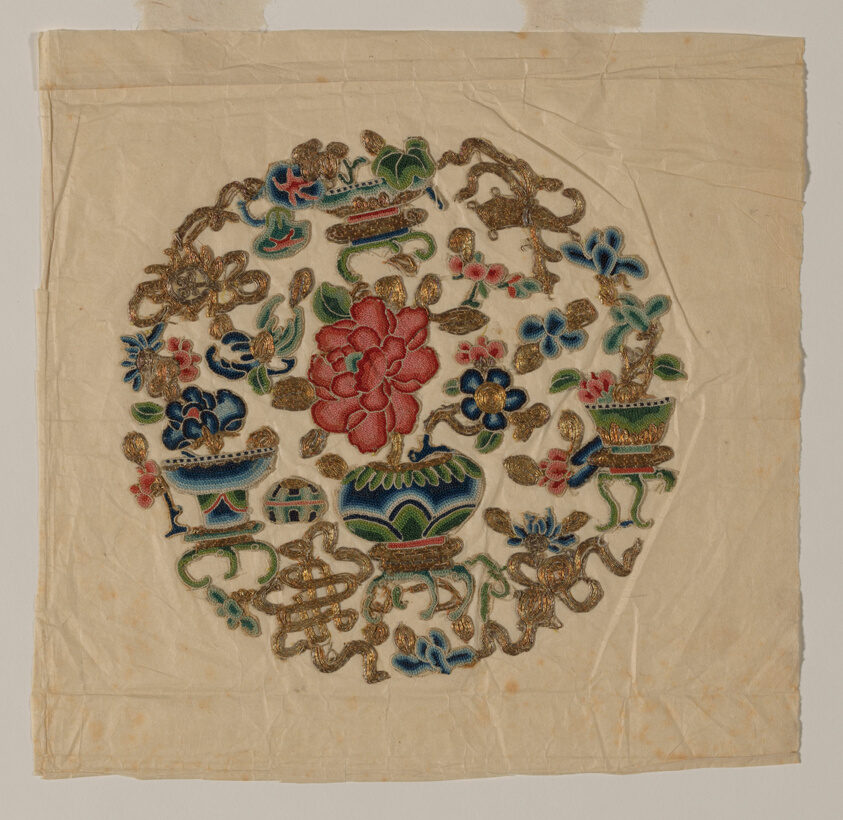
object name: Textile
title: Cut Out Motif (Needlework)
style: qing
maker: China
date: Qing dynasty (1644–1911), 19th century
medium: Silk, plain weave; embroidered with silk and gold-leaf-over-lacquered-paper-strip-wrapped cotton in knot stitches; laid work and couching; cut and glued to paper support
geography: China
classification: textile; needlework (visual works); weaving; accessories (object genre)